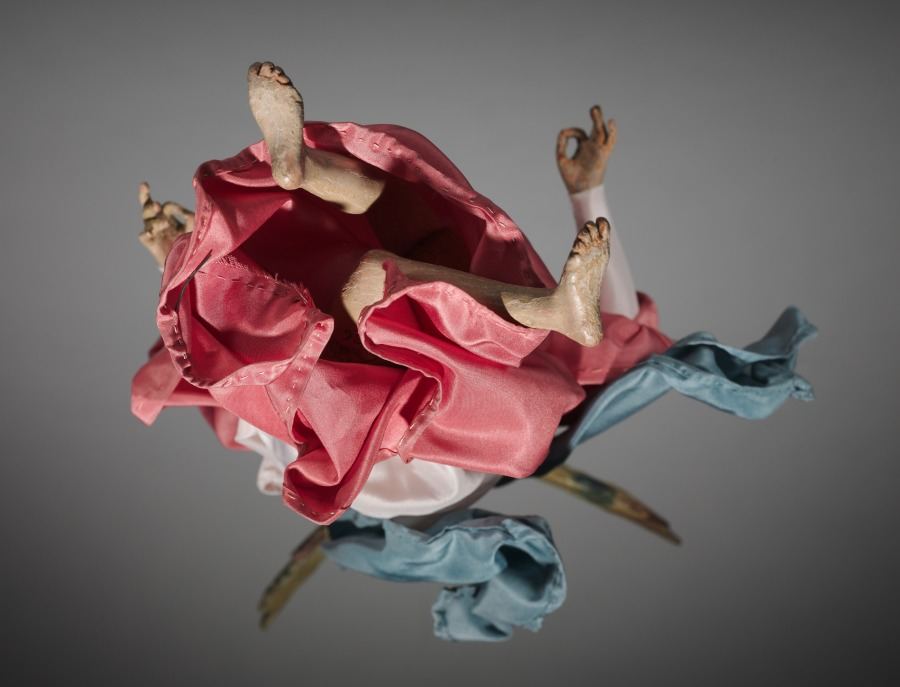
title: Figure from a Crèche: Angel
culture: Italy, Naples, late 18th-early 19th century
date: 1780–1830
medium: painted wood and terracotta with various textiles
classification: Sculpture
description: The practice of creating scenes of the Nativity for the home dates from the early 1700s in Italy, where people began to set up doll-like figures of about a foot or less in height. The custom was particularly popular in Naples around 1800, where crèche scenes (crèche means cradle, or crib) included many figures, whose heads and hands of painted terracotta, stuffed cloth bodies, and clothing adapted from contemporary local costumes gave them an amazingly realistic character. Representations of the birth of Jesus can be traced to the first few centuries of Christianity. Both living creatures and sculptural depictions of them were used from early times. By the late middle ages it was customary to create life-size figures of wood or stone, naturalistically painted, to represent the characters who participated in the events of Jesus's early life. These sculptures were then arranged in scenes illustrating one or both of the most important of these events, the Adoration of the Shepherds and the Adoration of the Magi-the three kings from the East who came to pay homage to the Christ child. Used in churches, these large figures were especially popular in Italy, Central Europe, Spain, and Portugal. This Object in Focus presentation was organized by Henry Hawley, Curator of Renaissance and Later Decorative Arts and Sculpture.